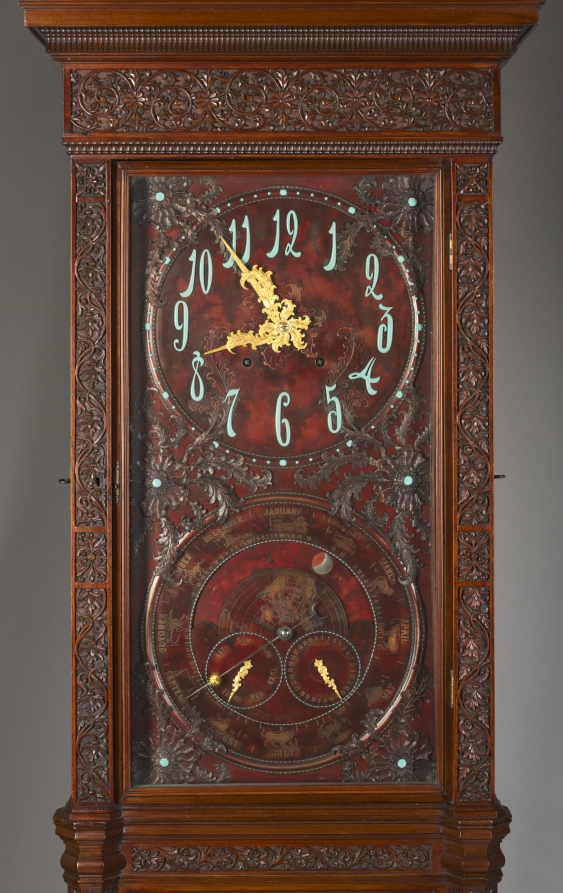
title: Tall Clock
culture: America, New York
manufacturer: Tiffany & Co. (America, New York, est. 1837)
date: c. 1880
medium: mahogany, teak with dial faces of gilded and patinated metal, glass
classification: Furniture and woodwork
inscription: lower dial face inscribed: Tiffany & Co., Makers.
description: In 1879, Louis Comfort Tiffany joined several other artisans to create an interior decoration firm called Associated Artists. The firm was very influential in advocating a rejection of historical styles in favor of the new fashion from more eclectic sources of inspiration, including the Islamic world and Japan. One of Tiffany's partners, Lockwood De Forest, traveled extensively in India to find carved wood and other decorative accessories that could be used in their designs. This clock's design was one result of this collaboration. The heavily carved panels on the clock were likely purchased in India during this time and assembled with a clock mechanism from Tiffany's father's shop, Tiffany and Co., whose name appears on the clock face.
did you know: Associated Artists assembled this clock using imported carved wood panels from India. For an American owner, the motifs suggested decorative styles from faraway places.